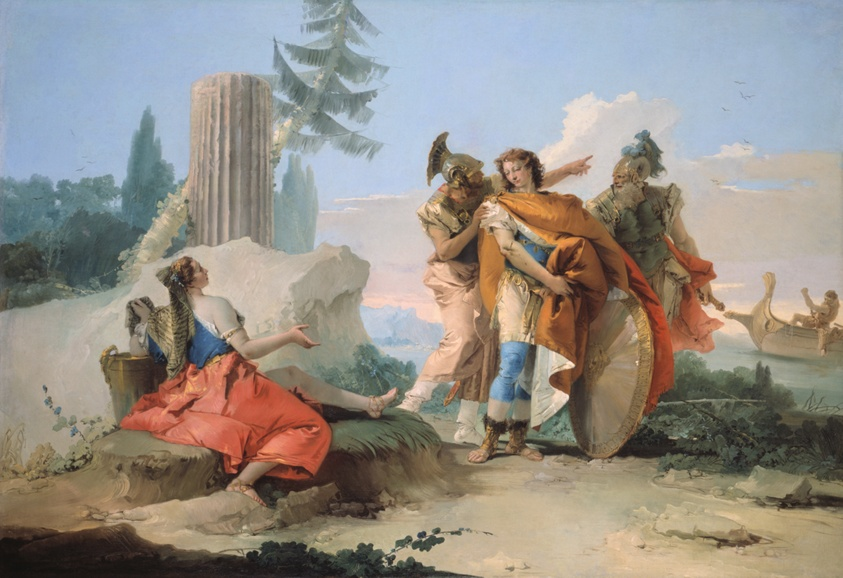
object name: Painting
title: Armida Abandoned by Rinaldo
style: Baroque, 18th Century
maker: Giovanni Battista Tiepolo (Italian, 1696–1770)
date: 1742/45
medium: Oil on canvas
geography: Italy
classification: oil on canvas; paint; oil paintings (visual works); Italian; painting; european painting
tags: Narrative, travel, ships, ruins, woman, woman, weapons, trees, soldiers, sky, shields, rocks, nature, men, man, love, landscapes, landscape, helmets, decorative, decoration, clouds, beauty, armor, Century of Progress, world's fairs, Chicago World's Fairs